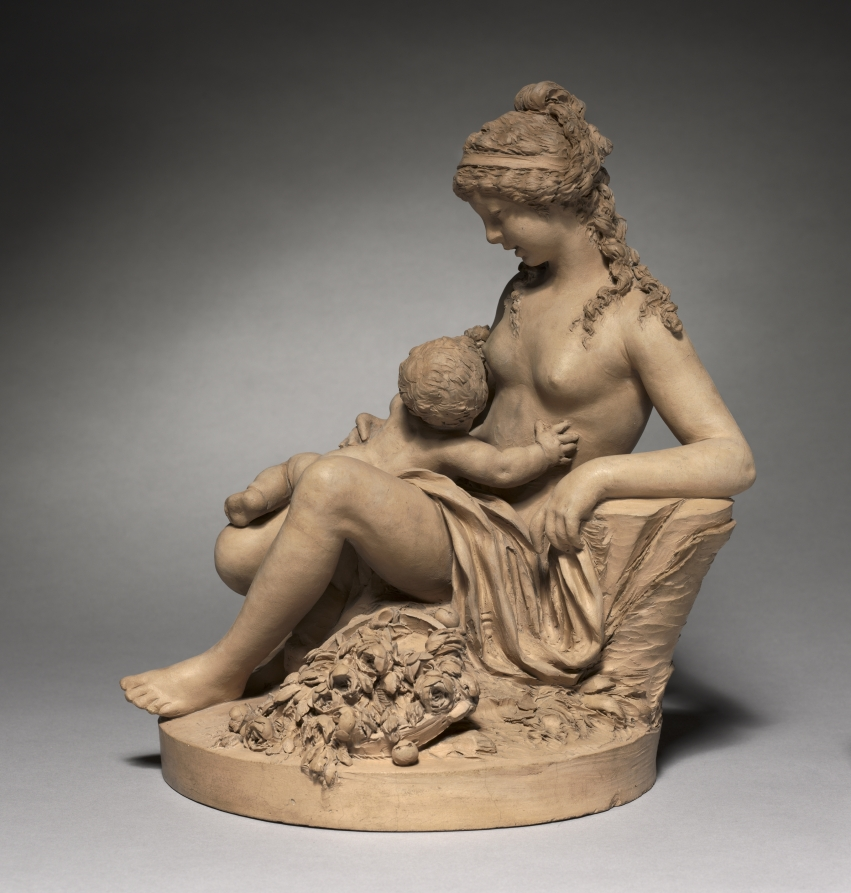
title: Young Woman and Child at Play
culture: France, 18th century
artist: follower of Clodion (French, 1738–1814)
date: 1780s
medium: terracotta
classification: Sculpture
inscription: inscribed: Clodion.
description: The French sculptor Claude Michel, called Clodion (1738–1814), constructed much of his work in terracotta. After firing, the unglazed color of the clay can vary widely, so each of Clodion's works in this medium has a slightly different hue, in this case a smooth reddish gray. Clodion depicts a mother nursing her newborn with painstaking attention to detail, from the tendrils of hair that cascade gracefully down to the mother's shoulders to the brilliant bouquet at the pair's feet.